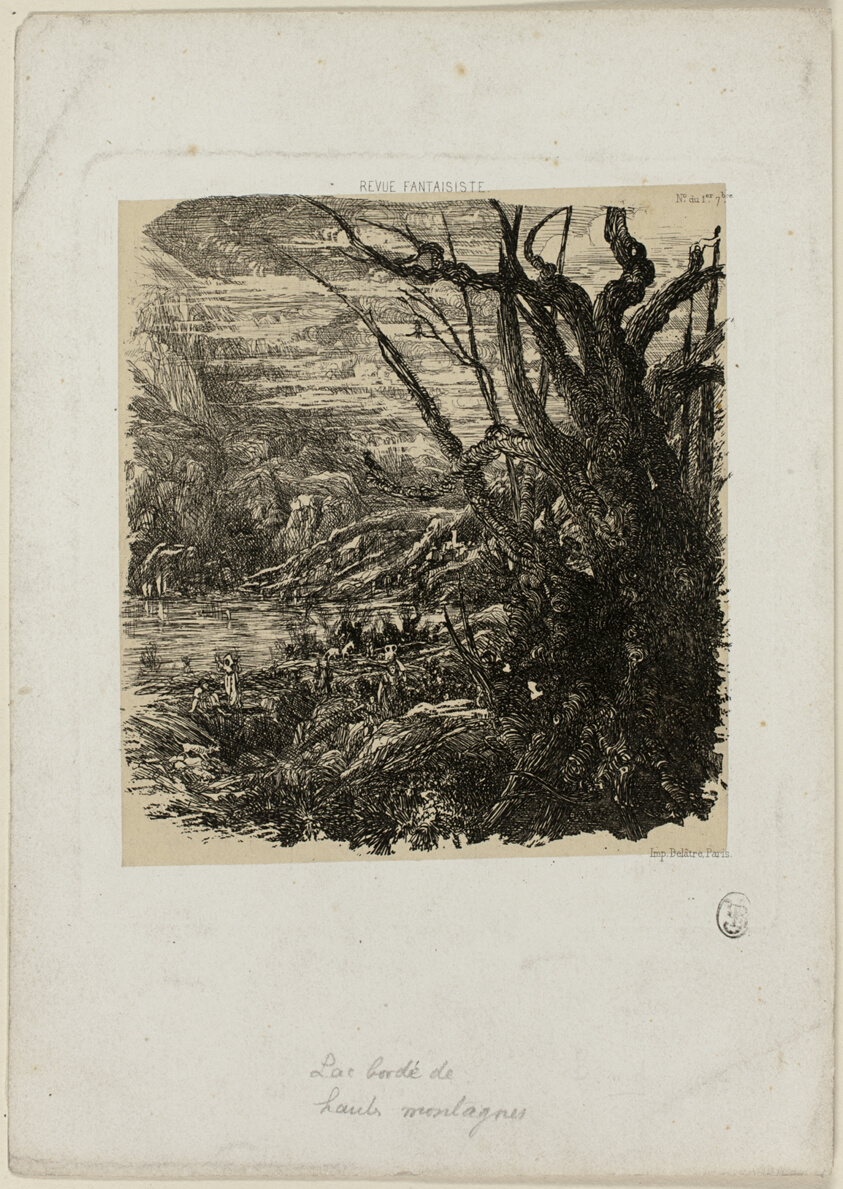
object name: Print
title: Lake in the Mountains, from Revue Fantaisiste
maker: Rodolphe Bresdin (French, 1825-1885)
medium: Etching on paper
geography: France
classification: etching; print; prints and drawing